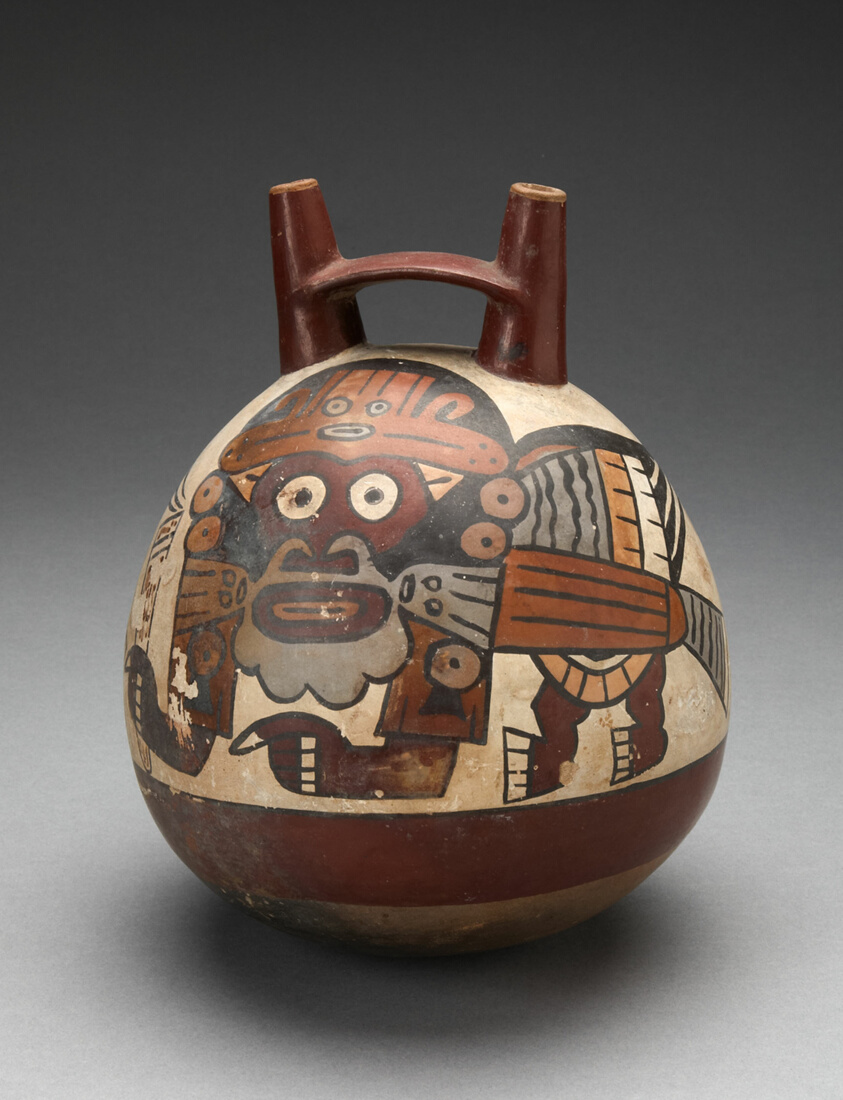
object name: Vessel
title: Double Spout Vessel Depicting Costumed Figure with Bird Attributes, Holding a Staff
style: nazca, early intermediate period, Pre-Columbian, americas, Arts of the Americas, andean, andes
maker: Nazca; South coast, Peru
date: 180 BCE–500 CE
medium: Ceramic and pigment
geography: Nazca Valley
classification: earthenware; art of the americas; ceramics; vessel